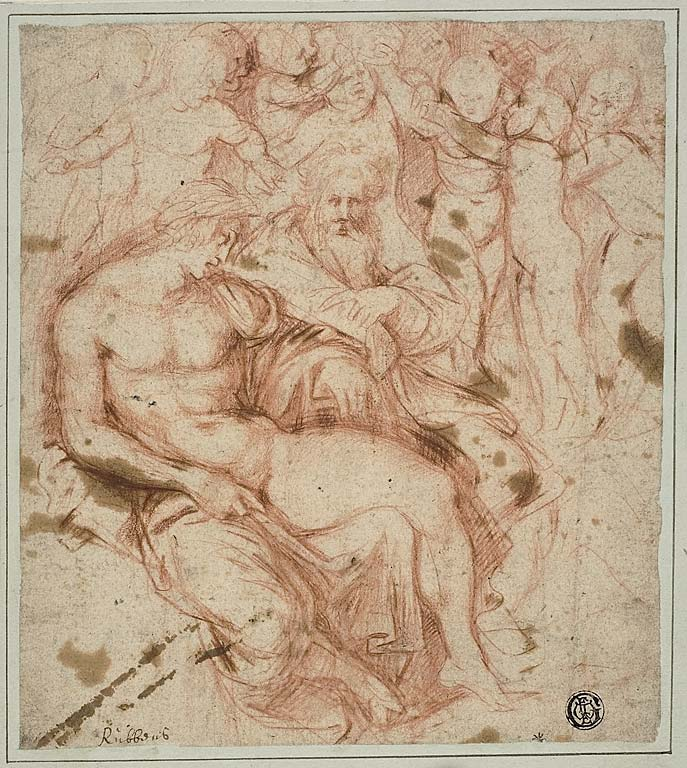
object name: Drawing and Watercolor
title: Mythological Subject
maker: Attributed to Jacques Bellange; French, 1594-1638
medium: Red chalk on ivory laid paper, laid down on card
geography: France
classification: chalk; drawings (visual works); prints and drawing